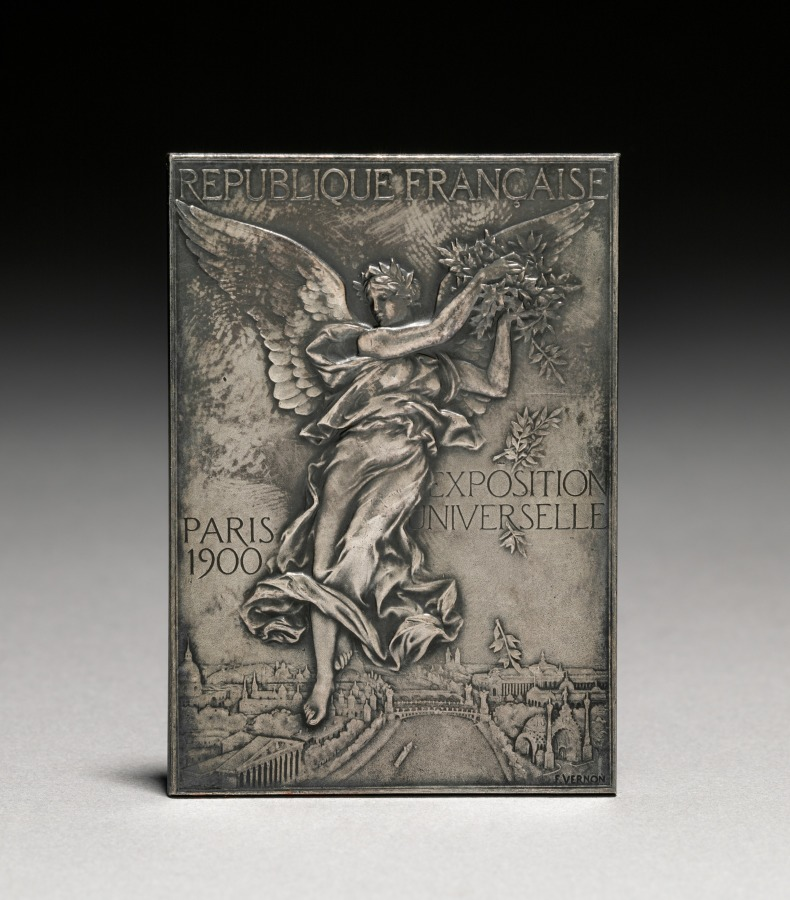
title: Medal of French Republic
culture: France, Paris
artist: F Vernon (French)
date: 1900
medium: silver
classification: Silver